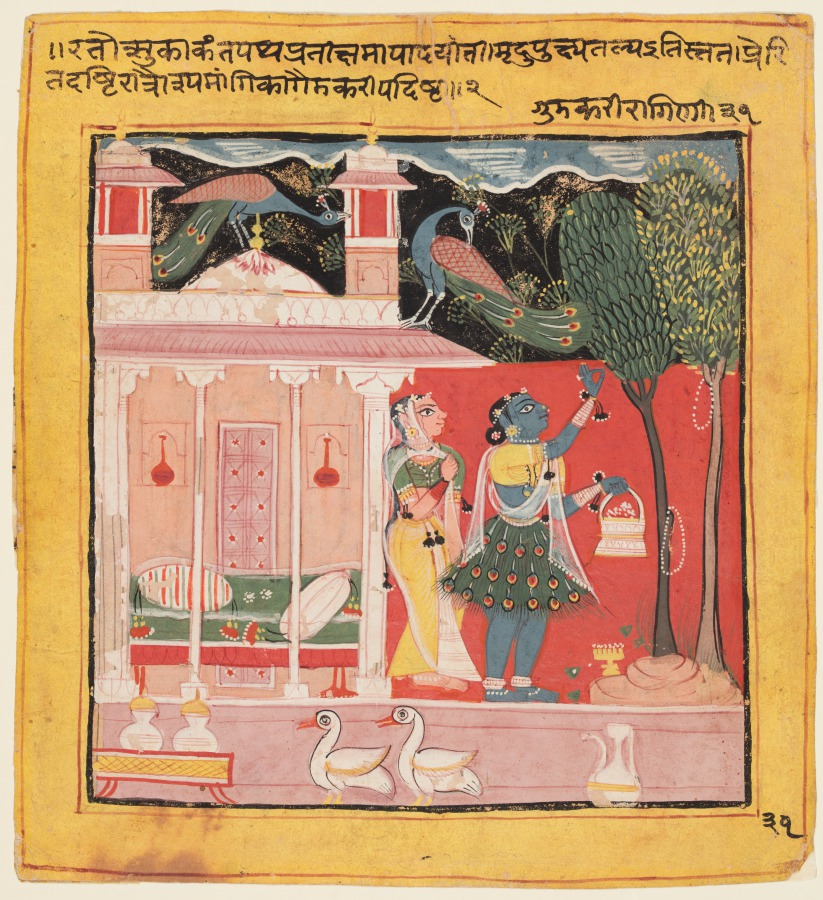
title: A Woman Plucks Leaves While Awaiting Her Lover: Gunakali Ragini of Malkos, from the “Chawand Ragamala”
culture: Northwestern India, Rajasthan, Rajput Kingdom of Mewar, Chawand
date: 1605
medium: gum tempera and ink on paper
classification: Painting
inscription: ratosukā kaṃta patha pratīkṣamā yādayotī. mṛdu pukṣya talya itistata. prerita dṛkhi rātrau traya maṃgi kagaimakari padiṣta. 2. gunakarī rāgiṇī 31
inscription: Inscribed: “Goundakari Ragini” with the number 31 in the lower right corner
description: On a terrace outside an open bedchamber, a dark-skinned woman wearing a skirt of peacock feathers plucks leaves from a tree and has filled her basket with flowers. She has made garlands and hung them on the trees, probably in accordance with a vow made in the ardent hope of bringing back her overdue lover. In accordance with the verse, two peacocks stand perched on the roof.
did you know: She has lit a six-flame lamp at the foot of the tree in her vigil.